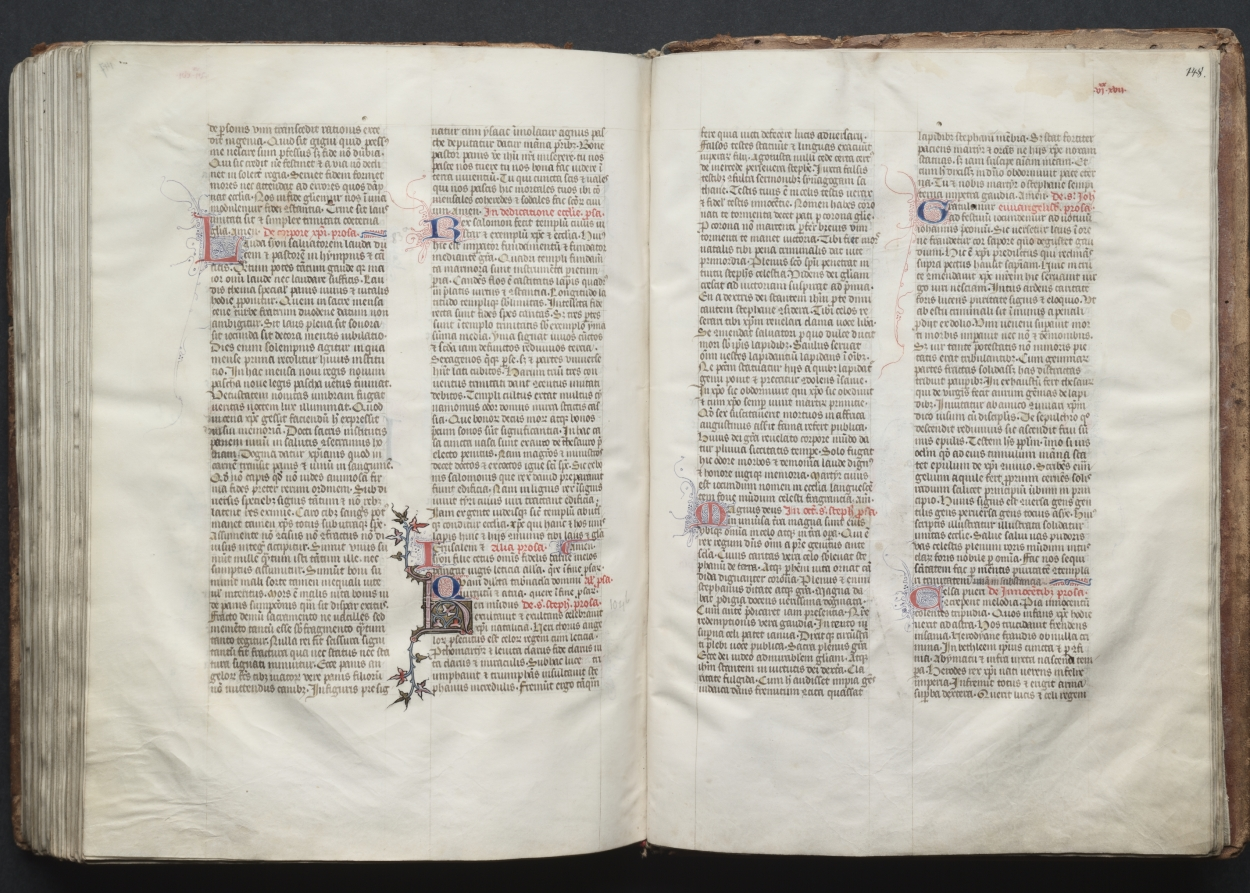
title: The Gotha Missal: Fol. 147v, Text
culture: France, Paris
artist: Master of the Boqueteaux (French)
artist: and Workshop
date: c. 1375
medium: ink, tempera, and gold on vellum; blind-tooled leather binding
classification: Bound Volume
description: The style and quality of this manuscript's decoration is typical of deluxe Parisian books made for aristocratic or royal patrons. Most of the book's decoration appears to be the work of the Master of the Boqueteaux, an artist active at the court of King Charles V (died 1380). His style was apparently shared by a number of book illuminators working in and around Paris. It is very possible that the Gotha Missal belonged to Charles V, but is not provable because the manuscript has no royal portraits and lacks a colophon. Given the book's magnificent decoration, however, it would seem that it was produced for a Valois prince, if not for the king himself. The manuscript receives its name from the German dukes of Gotha, its later owners.